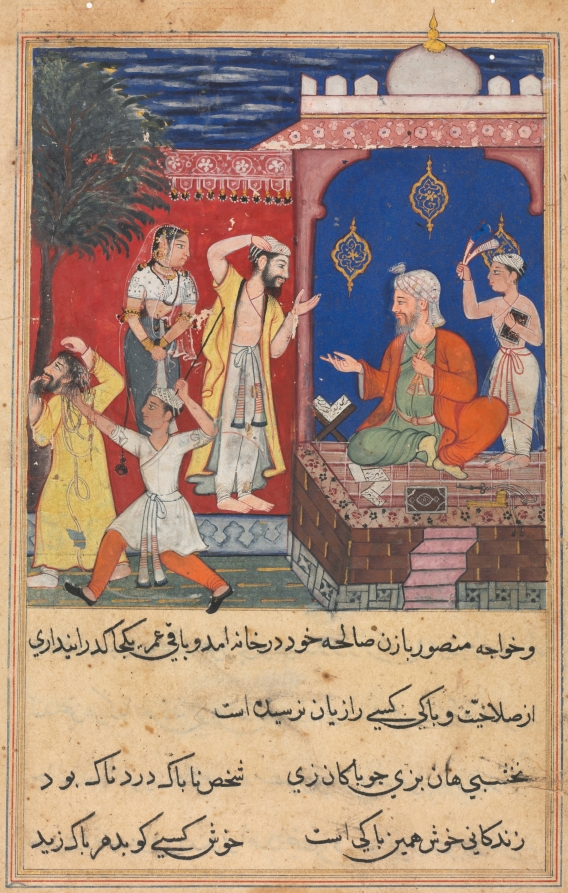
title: The false Mansur punished before the judge and expelled from the city, from a Tuti-nama (Tales of a Parrot): Seventeenth Night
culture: Mughal India, court of Akbar (reigned 1556–1605)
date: c. 1560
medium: gum tempera, ink, and gold on paper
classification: Painting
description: When the true merchant Mansur returns home to find an imposter in his place, he takes him to a judge to settle the matter. After testimony of Mansur’s wife, the imposter is revealed. In the image, the real Mansur stands with his wife, addressing the seated judge. Below them, the imposter is led away, turban unraveled, while being beaten with a stick.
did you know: The documents before the judge are marked with Arabic script, implying an Islamic context.